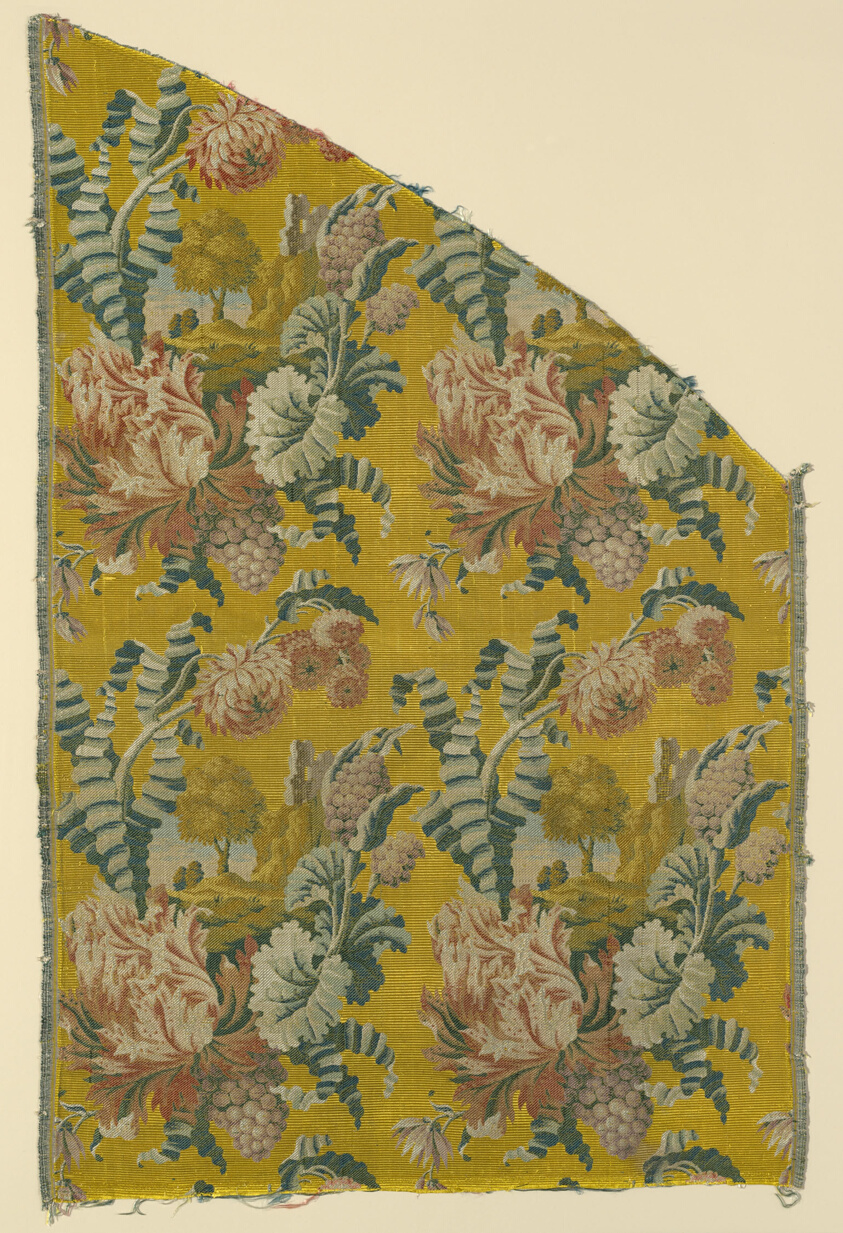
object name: Textile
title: Panel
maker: France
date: c. 1736/39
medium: Silk, plain weave with supplementary brocading wefts, supplementary patterning warps tied by supplementary binding warps, and self-patterned by two-color complementary ground wefts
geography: France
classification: textile; weaving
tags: flowers, foliage, grapes